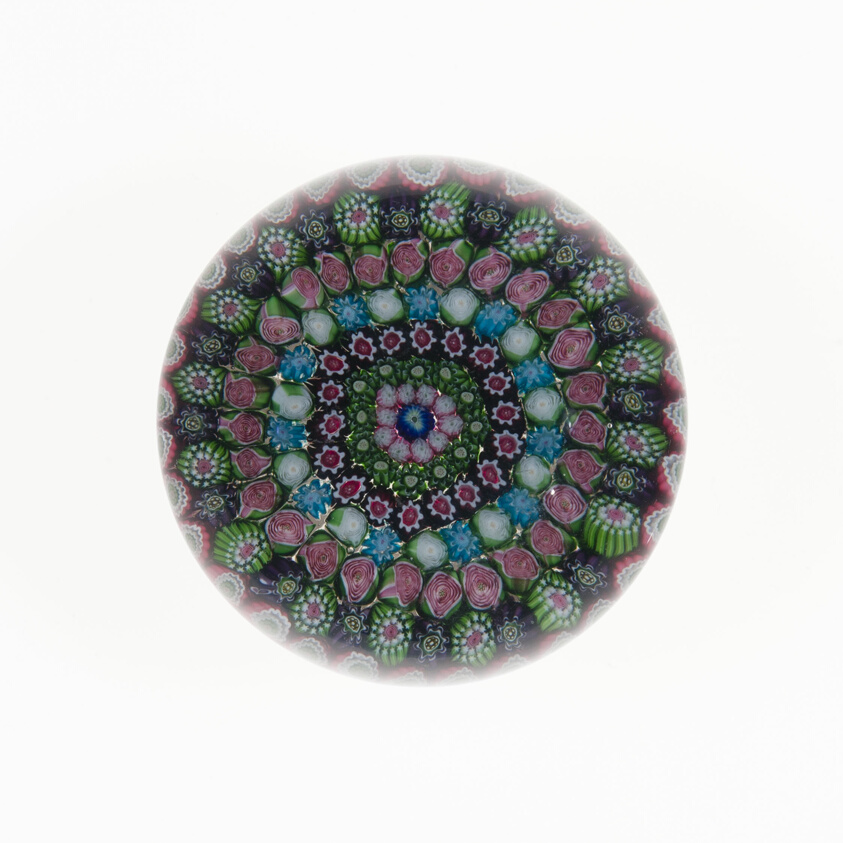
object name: Glass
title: Paperweight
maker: Saint-Louis Glassworks (Cristalleries de Saint-Louis); Lorraine, France, founded 1586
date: c. 1846–55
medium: Glass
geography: Saint-Louis-lès-Bitche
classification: paperweight; millefiori; european decorative arts; glass